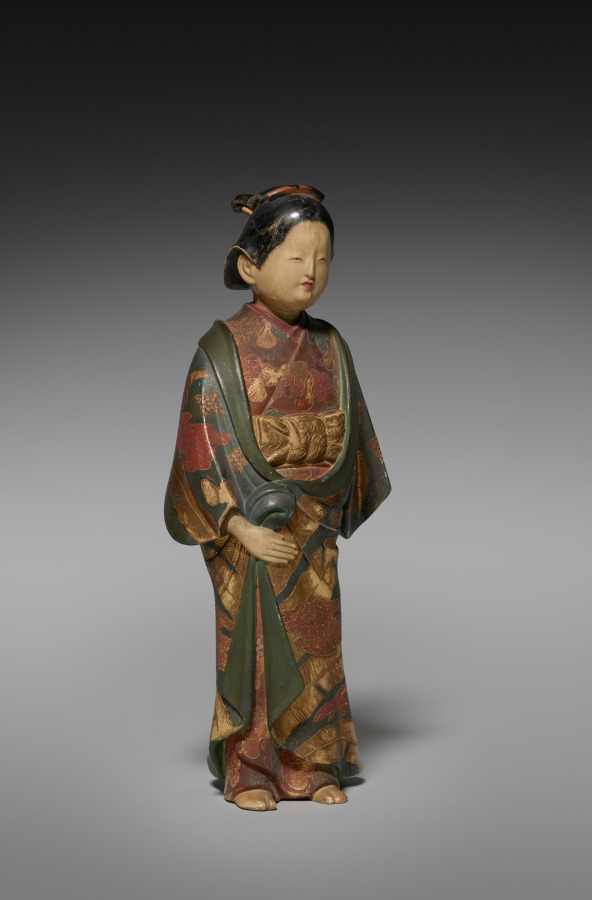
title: Saga Doll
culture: Japan, Edo period (1615–1868)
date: 1688–1703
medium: lacquered wood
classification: Sculpture